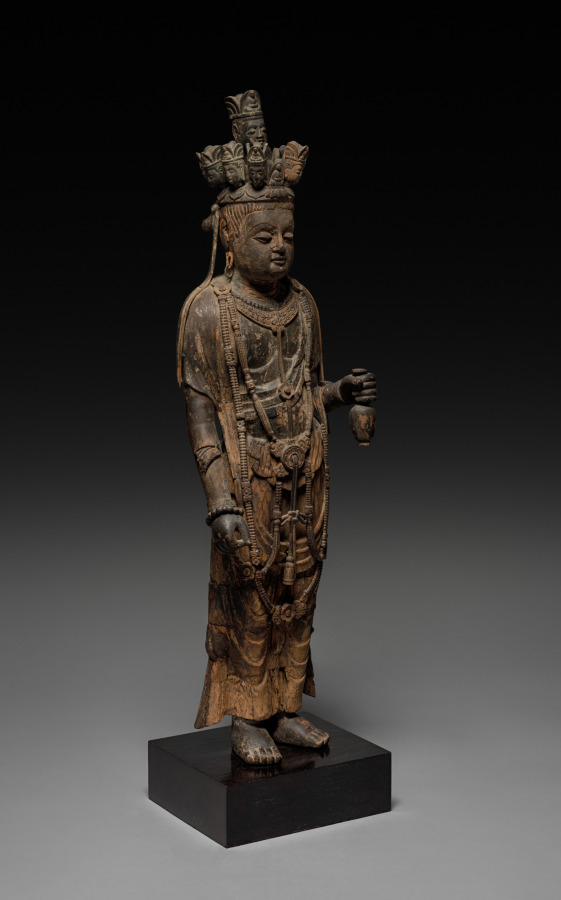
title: Eleven-Headed Guanyin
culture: China, Tang dynasty (618–907)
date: late 600s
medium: wood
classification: Sculpture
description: Guanyin, the bodhisattva of infinite compassion, can be identified by his attributes, carrying a tiny Amida Buddha in his crown, and holding a bottle with the nectar of life in his left hand. The eleven-headed Guanyin, in particular, has his eyes and ears open in all directions to hear, see, and help all those who are in distress. The garment and jewelry of this graceful figure remind us that the historic Buddha Shakyamuni was originally an Indian prince before he reached enlightenment. Upon his death, he entered nirvana, an eternal state free of desire and suffering, outside the realm of birth, death, and rebirth. The dating and attribution of the figure as being from China needs further study.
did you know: The sculpture was made of different types of wood with different grain sizes and patterns, which are connected with wood pegs and glue.